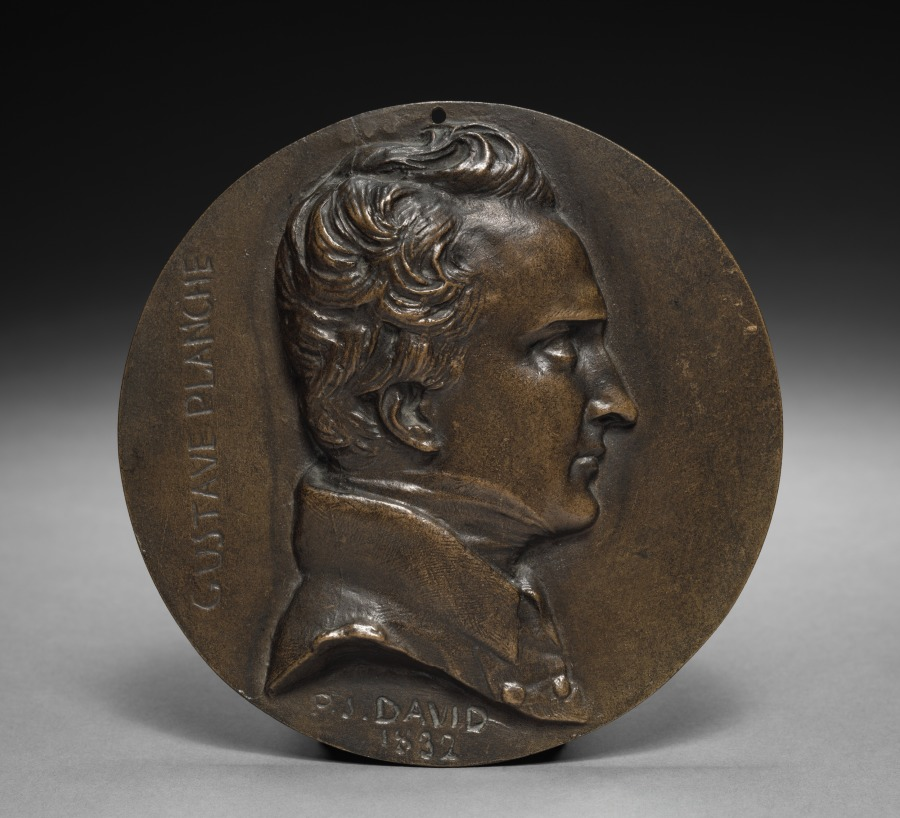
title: Gustave Planche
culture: France, 19th century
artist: Pierre-Jean David d'Angers (French, 1788–1856)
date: 1832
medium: bronze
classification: Sculpture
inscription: inscribed on the left with marks made in the mold: "GUSTAVE PLANCHE." Also inscribed in the mold in the lower center: "P.J. DAVID / 1832." The medallion is stamped on the back: "375."